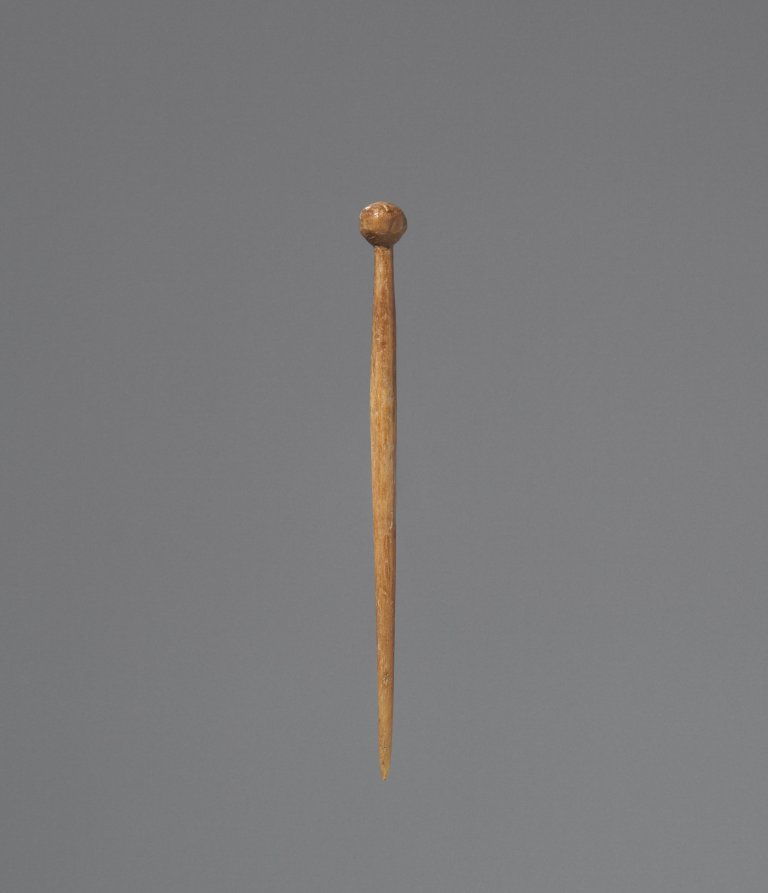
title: Hairpin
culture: Greece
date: 400s BCE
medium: ivory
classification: Ivory